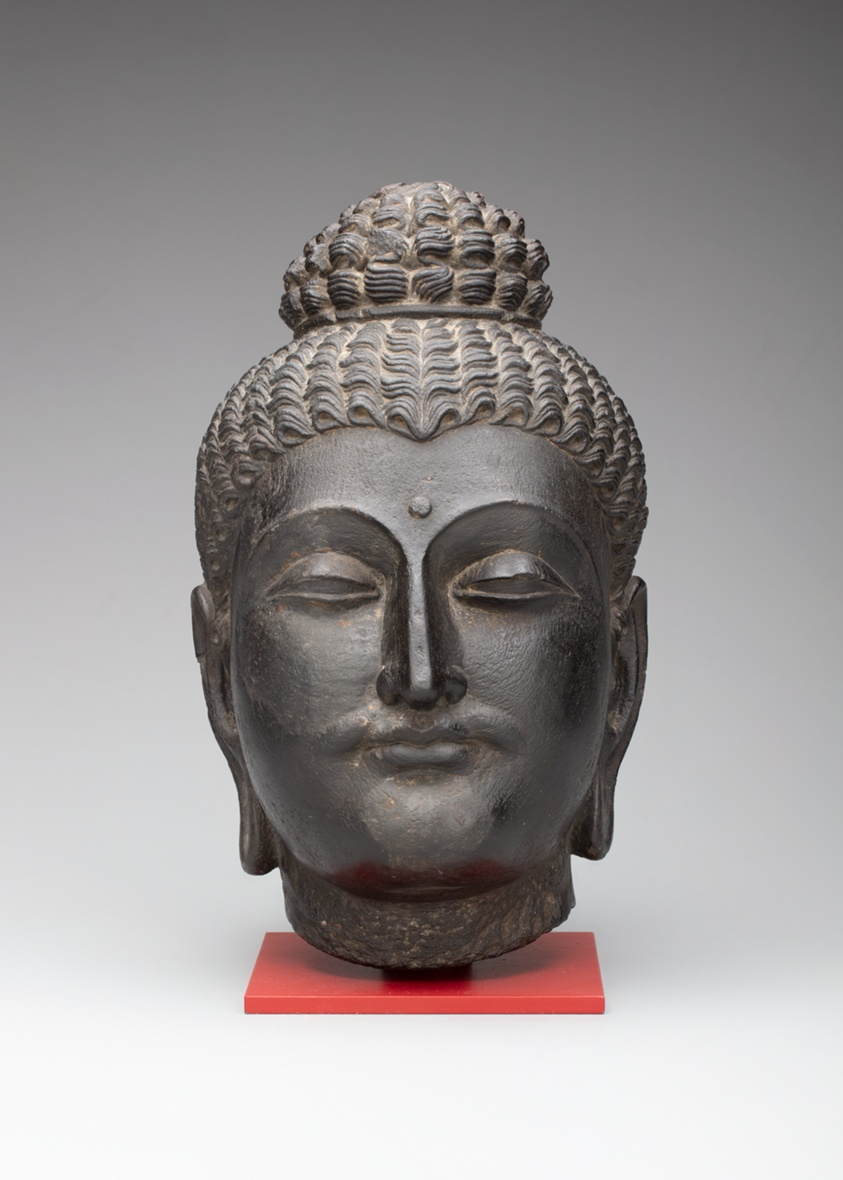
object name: Sculpture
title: Head of Buddha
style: South Asian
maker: Pakistan; Ancient region of Gandhara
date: Kushan period, 2nd/3rd century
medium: Gray schist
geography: Gandhara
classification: bust/head; stone (unidentified); stone; sculpture; asian art